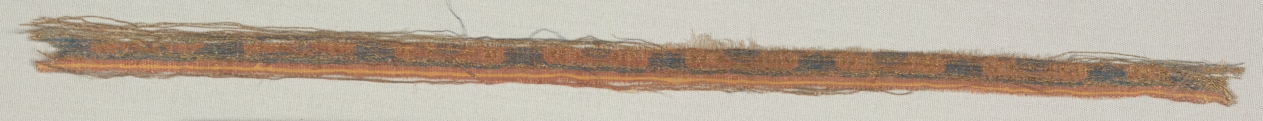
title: Silk Fragment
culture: Spain, Islamic period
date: c. 1279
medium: plain compound cloth; silk and gold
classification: Textile